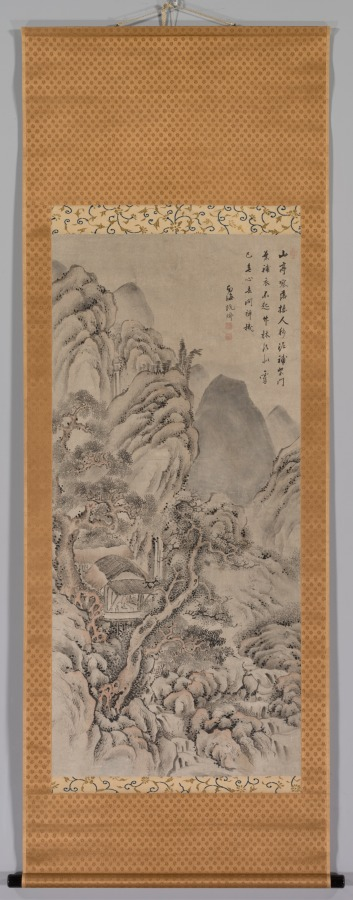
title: Landscape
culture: Japan, Edo period (1615–1868)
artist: Gion Nankai (Japanese, 1677–1751)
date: c. 1700–1751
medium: hanging scroll; ink and color on paper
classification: Painting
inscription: artist's inscription, signature and two seals at upper right corner.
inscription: The mountain pavilion is desolate, visitors are rare./ Mud patches the brushwood gate; leaves patch my clothes./ Rising not from the bamboo bed, my head like snow./ Already without intent, I abandon questions of Zen.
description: A teacher of Confucian ethics, the Chinese philosophical system focused on social harmony and familial responsibility, Gion Nankai was also a painter. Ike Taiga (池大雅) (1723–1776) was among his students. Nankai inscribed this landscape with one of 24 poems for painting subjects composed by the scholar and painter Tang Yin (唐寅) (Chinese, 1470–1524). It reads as follows: The mountain pavilion is desolate, visitors are rare. Mud patches the brushwood gate; leaves patch my clothes. Rising not from the bamboo bed, my head like snow. Already without intent, I abandon questions of Zen.